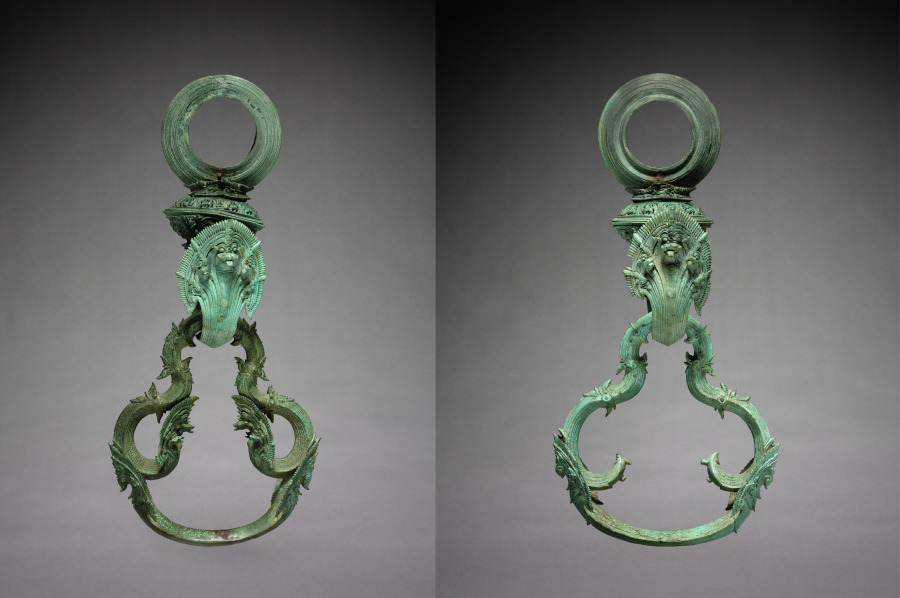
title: A Pair of Decorated Palanquin Hooks and Rings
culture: Cambodia, Angkor Wat Style, 12th century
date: 1100–1175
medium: bronze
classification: Sculpture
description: Hooks, suspension rings, and finials cast in bronze are very common fixtures in Cambodian decorative art. Frequently they served a practical function, such as the present set, used for a palanquin in which a person was carried from place to place. The litter or throne was fastened to the rings which in turn were suspended from the books fixed by bolts to transverse poles carried on the shoulders of the palanquin bearers. Chariots, palanquins, furniture, and harnesses were frequently embellished with various bronze decorations, finials, and fixtures. Those, as a rule, were gilded making the objects they served look very sumptuous. The relief sculpture found on various Khmer monuments, such as Angkor Wat or Bayon for instance, illustrates well the use and context of those bronze implements in ancient Cambodian life. These frequently elaborate bronze fixtures were decorated with motifs generally popular in Cambodian art: such as nagas, garudas, floral, or animal patterns. This pair of hooks and rings, unusually large in size, take on a naga form in the hooks. They are decorated with perforated floral and animal motifs done with great care and precision. The rings, suspended from hooks, are in the form of tri-fold flower stalks with naga motifs repeated at the end of the curved stalks. Such elaborate and huge hooks and rings must have, no doubt, decorated a palanquin of an important individual, possible a ruler himself. Their decoration is typical of the mature Angkor Wat style.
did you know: The naga, a water serpent with a multi-headed hood, is a Khmer national emblem.